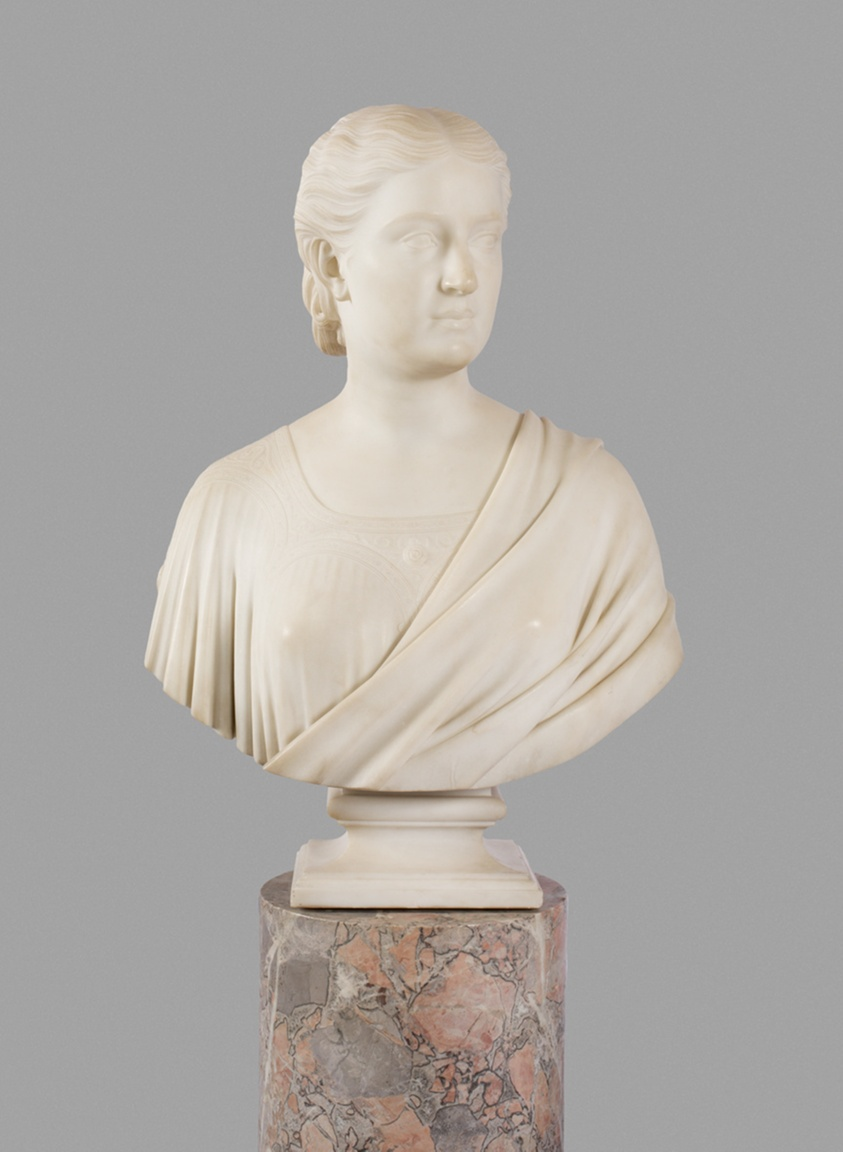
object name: Sculpture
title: Mrs. Potter Palmer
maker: Hiram Powers (American, 1805–1873)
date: 1871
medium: Carrera marble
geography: United States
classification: sculpture; american arts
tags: Chicago, people, portraits